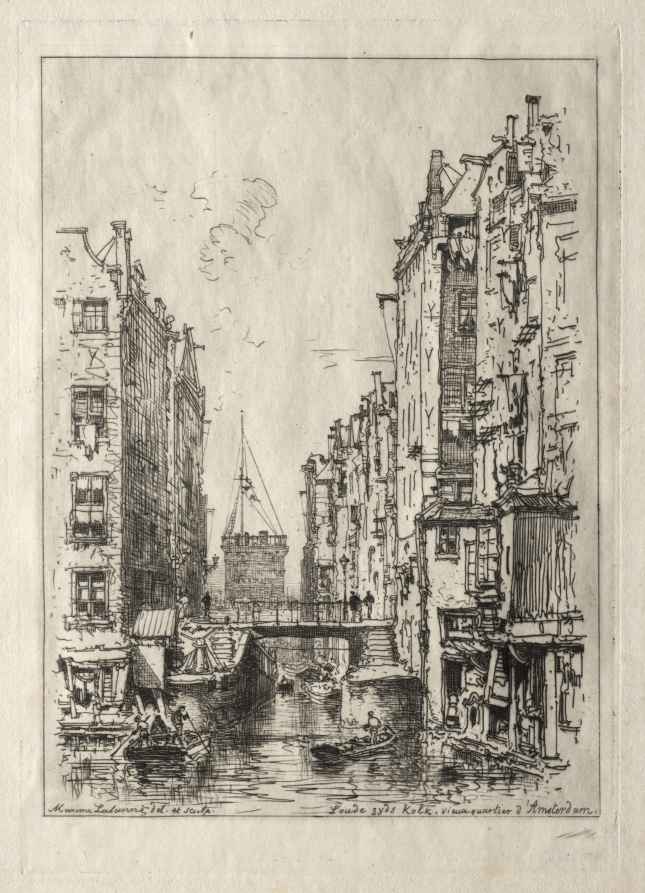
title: Old Quarter of Amsterdam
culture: France, 19th century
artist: Maxime Lalanne (French, 1827–1886)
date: 1881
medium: etching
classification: Print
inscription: signed in the plate, at lower left: Maxime Lalanne del. et sculp.; inscribed in the plate, at lower right: L'oude zyds Kolk. Vieux quartier d'Amsterdam